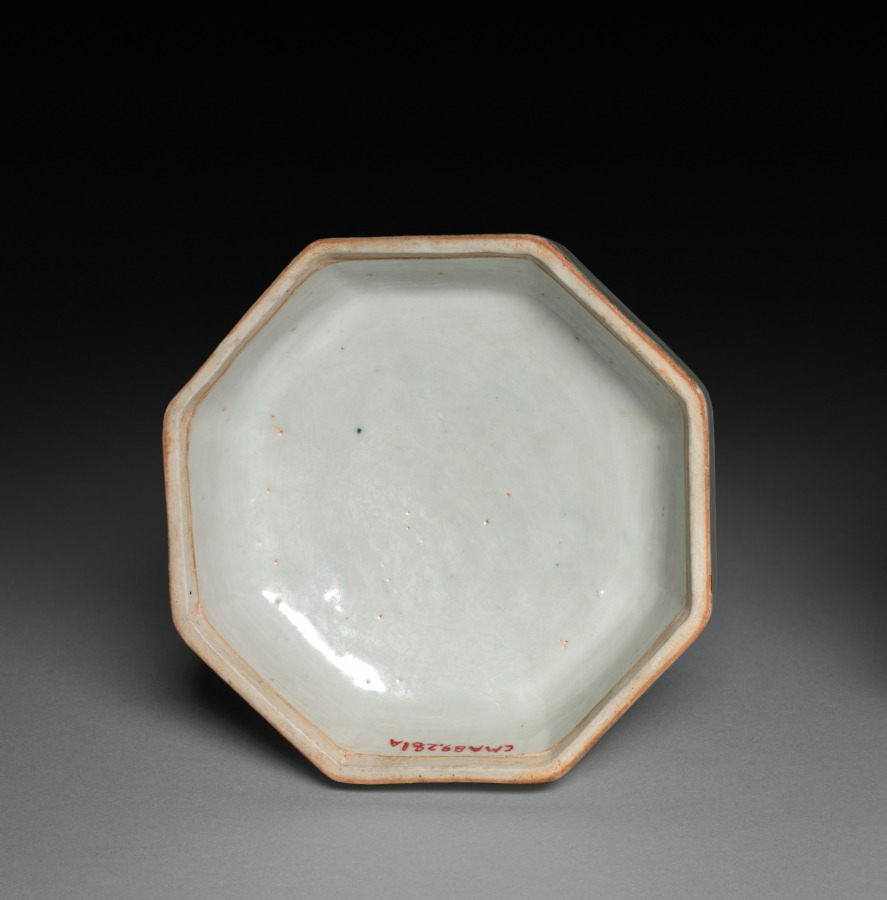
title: Hexagonal Covered Box with Lions in Relief: Qingbai Ware (lid)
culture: China, Jiangxi province, Jingdezhen kilns, Yuan dynasty (1271-1368)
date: 1300–1325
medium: glazed porcelain with molded and applied decoration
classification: Ceramic